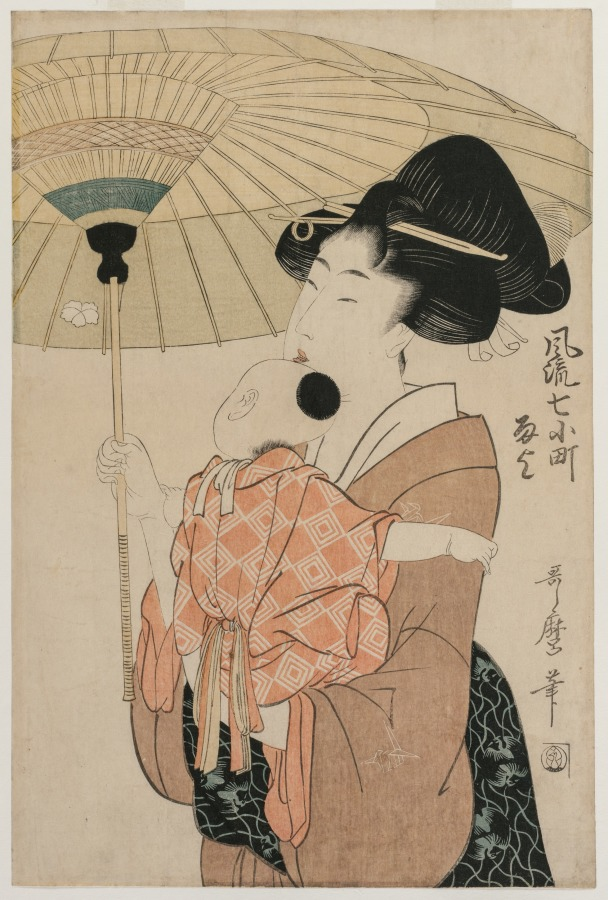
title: Prayers for Rain, from the series Seven Elegant Komachi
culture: Japan, Edo period (1615–1868)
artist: Kitagawa Utamaro (Japanese, c. 1754–1806)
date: late 1790s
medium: Woodblock print; ink and color on paper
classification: Print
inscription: Signature: Utamaro hitsu.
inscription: Publisher: Tsuruya Kinsuke (emblem).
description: Seven plays based on legends from the life of 9th-century poet Ono no Komachi served as the source for this print series. In the play, Komachi shelters from the rain under an umbrella held by her servant. In this print, an elegantly coiffed mother and child replace the poet and her servant.